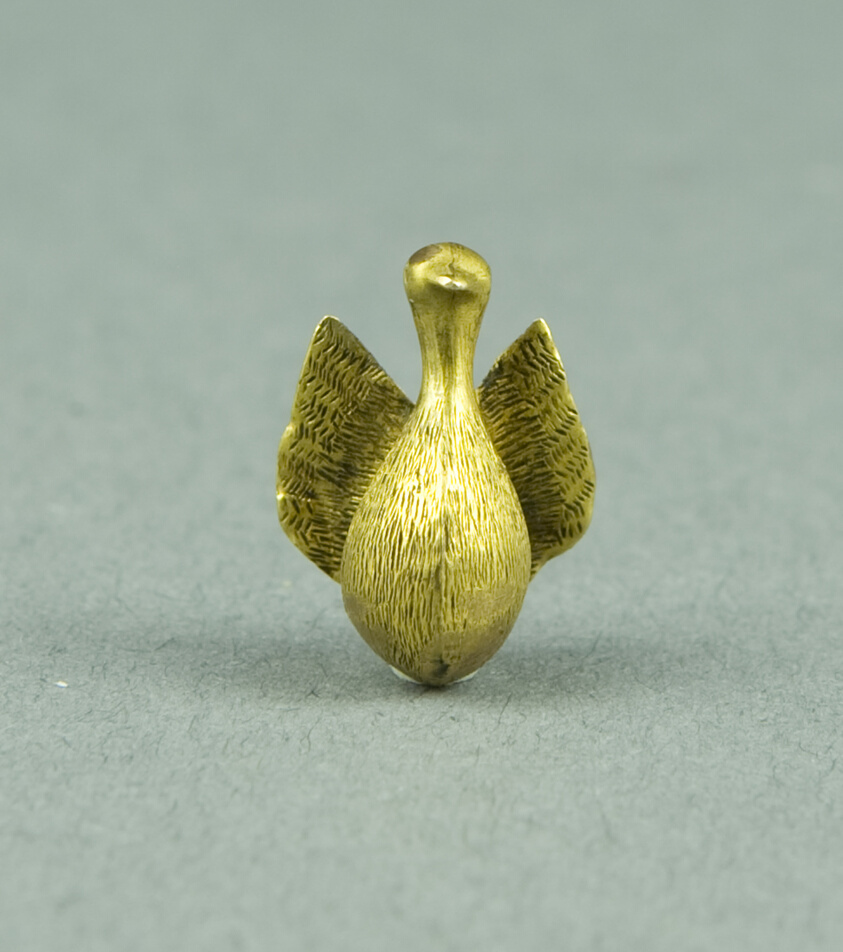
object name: Costume and Accessories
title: Flying Bird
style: greco-roman (egyptian)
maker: Greco-Roman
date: Greco–Roman Period (332 BCE–395 CE)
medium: Gold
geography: Egypt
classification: gold; metal; jewelry; ancient art; costume